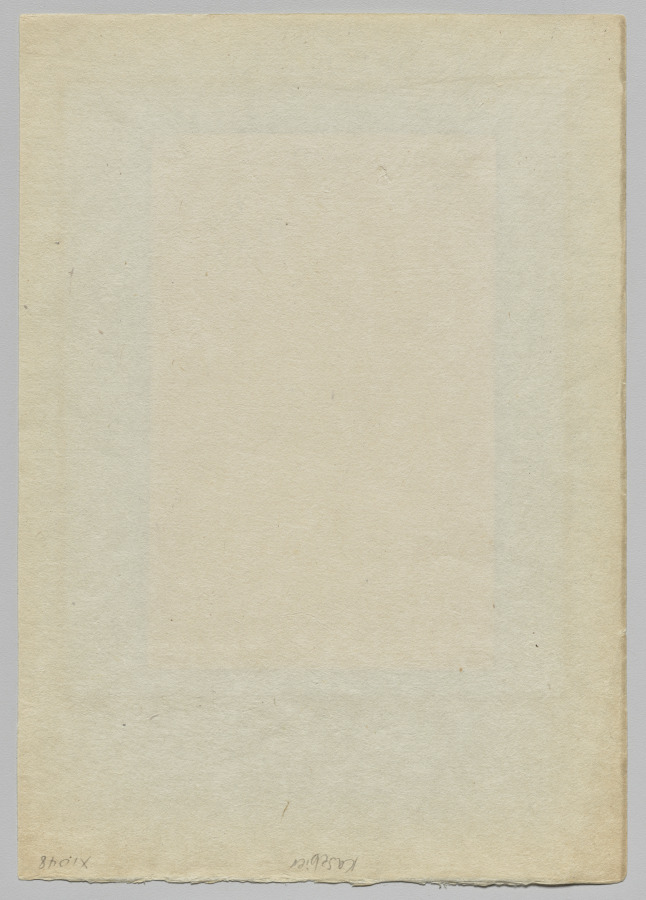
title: Italy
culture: America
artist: Gertrude Käsebier (American, 1852–1934)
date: c. 1889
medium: platinum print mounted to Japanese paper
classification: Photograph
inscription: Written in pencil on verso of photograph: Mar/7 x 10”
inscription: Written in pencil on verso of mount: “Kasebier x 1.08”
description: Italy provides insight into Käsebier’s earliest artistic productions. The woman’s pose and central placement emphasize the picture’s formalism and careful construction. Her rigid vertical posture echoes the trees in the background. Soft focus, a device borrowed from Pictorialist photography, frustrates a clear view of her features, suggesting that the image is neither portrait nor snapshot but a symbolic statement about womanhood and its association with nature.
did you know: Gertrude Käsebier did not begin to study art until she was 37 and had 3 adolescent children.